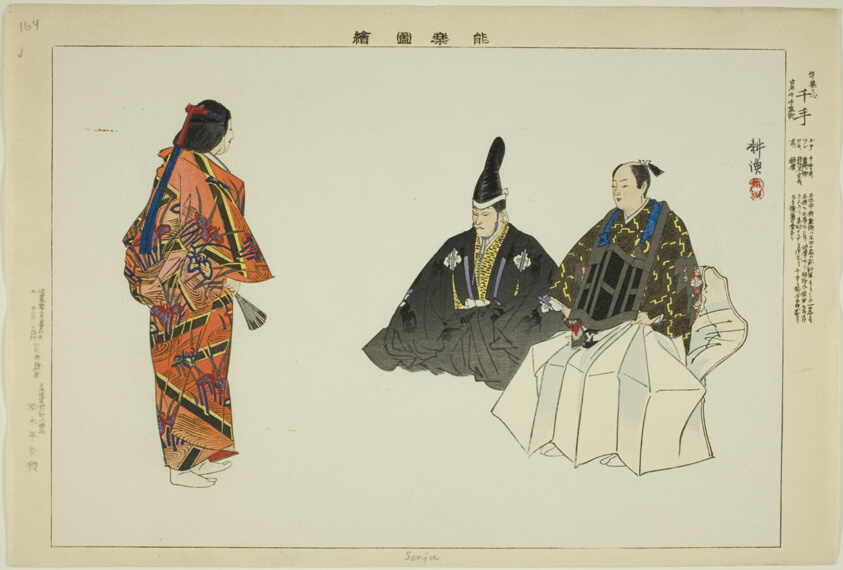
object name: Print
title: Senju, from the series "Pictures of No Performances (Nogaku Zue)"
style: Japanese (culture or style)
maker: Tsukioka Kogyo; Japanese, 1869-1927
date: 1898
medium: Color woodblock print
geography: Japan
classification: woodblock print; print; asian art